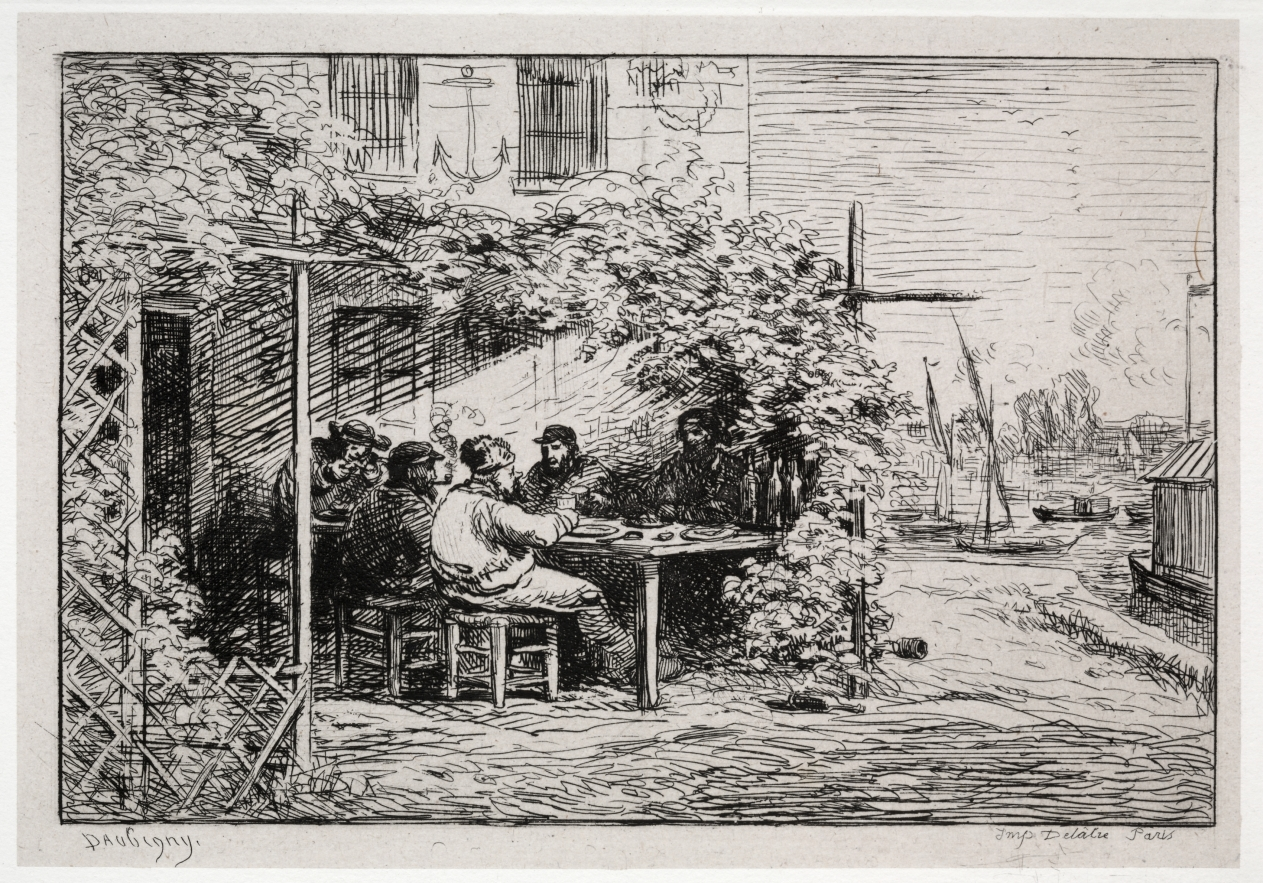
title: The Boat Trip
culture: France, 19th century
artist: Charles François Daubigny (French, 1817–1878)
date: 1861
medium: 16 etchings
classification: Portfolio